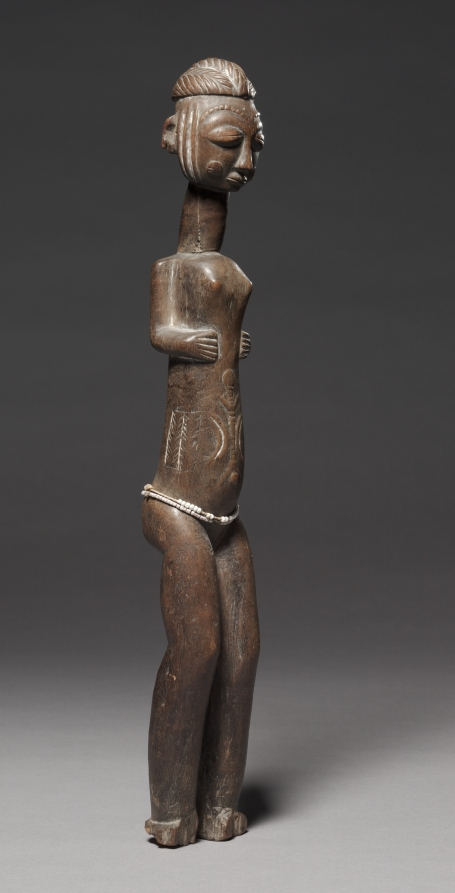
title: Female Figure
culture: Africa, West Africa, Côte d'Ivoire, possibly Bondoukou region, unknown maker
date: late 1800s–early 1900s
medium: Wood, paint, glass beads, and natural fiber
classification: Sculpture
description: An artistic melting pot, the Bondoukou region in northeastern Côte d’Ivoire near the border with Ghana is inhabited by several ethnic groups whose cultures and artistic styles often intermingle. This figure’s rounded shapes and delicate surface decoration––which seem to imitate body scarifications––closely resemble the style of Baule carvings. The figure’s meaning and function remain a mystery.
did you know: Artworks from different regions traveled across Africa; while found in Wenchi, Ghana, this figure was made in nearby Côte d'Ivoire.